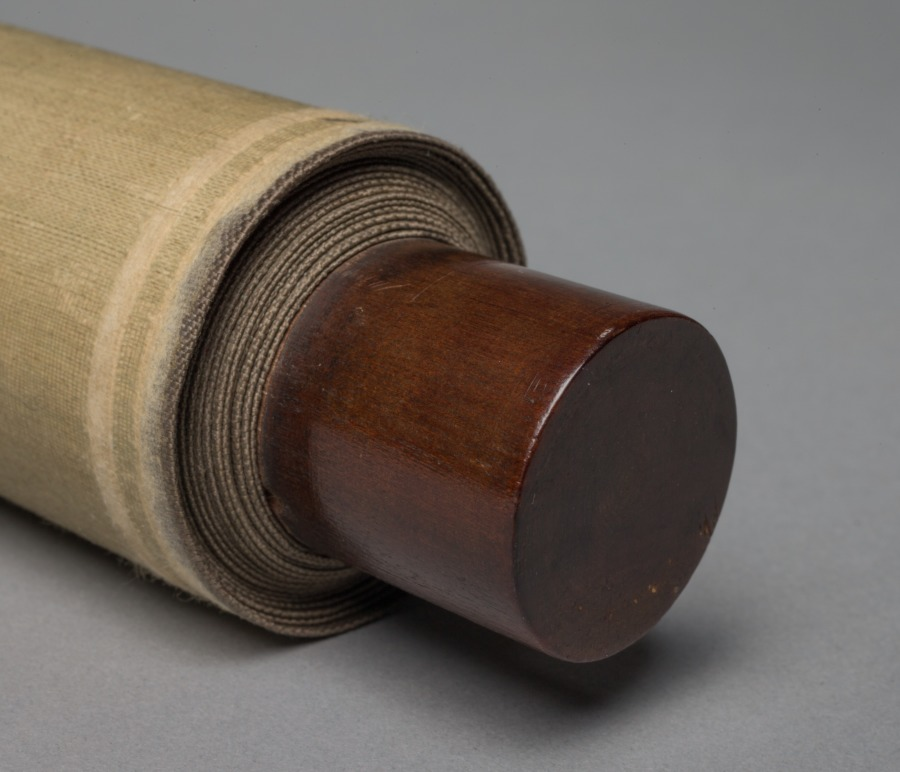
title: Night Scene on the Sumida River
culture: Japan, Edo period (1615–1868)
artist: studio of Utagawa Hiroshige (Japanese, 1797–1858)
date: 1800s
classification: Painting